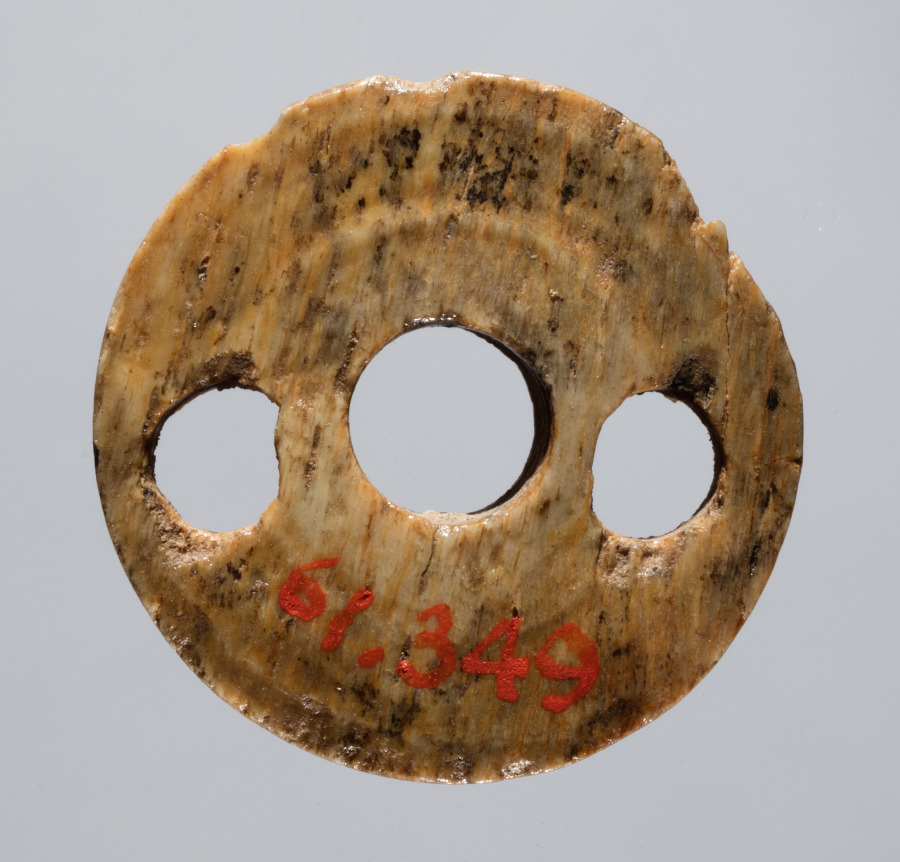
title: Spindle Whorl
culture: Iran, early Islamic period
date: 700s - 900s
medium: bone, incised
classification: Spindle Whorl